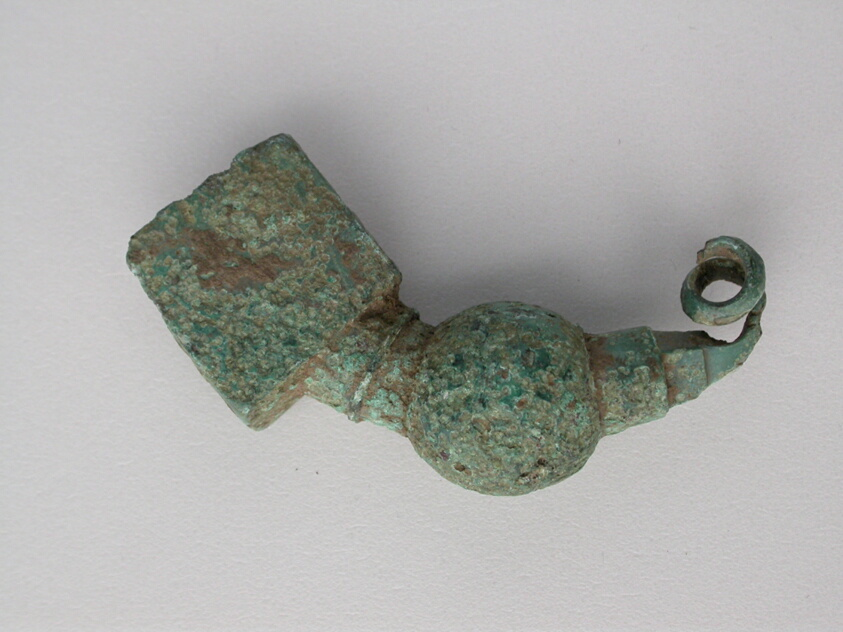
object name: Costume and Accessories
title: Bow Fibula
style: geometric, ancient, greek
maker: Greek; Thessaly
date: Geometric Period (800–700 BCE)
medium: Bronze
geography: Greece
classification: votive offering; jewelry; ex-voto; fibula; costume